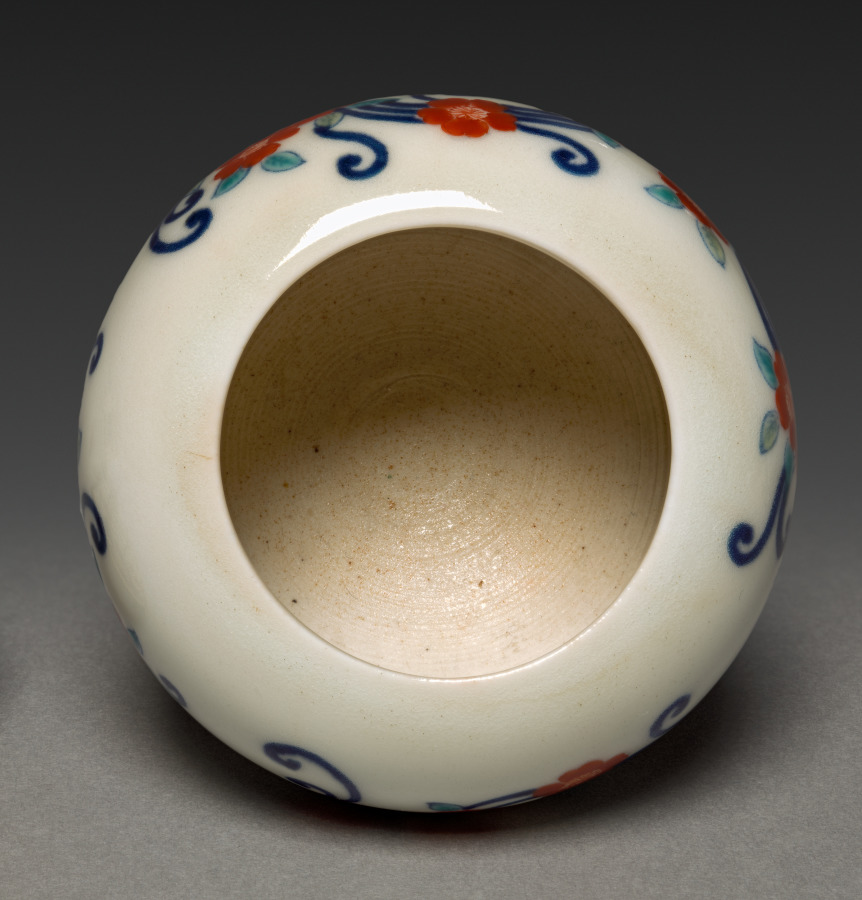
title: Incense Burner with Floral Scroll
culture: Japan, Edo period (1615–1868)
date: early to mid-1800s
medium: Porcelain with underglaze blue and overglaze enamel decoration (Hizen ware, Nabeshima style)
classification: Ceramic